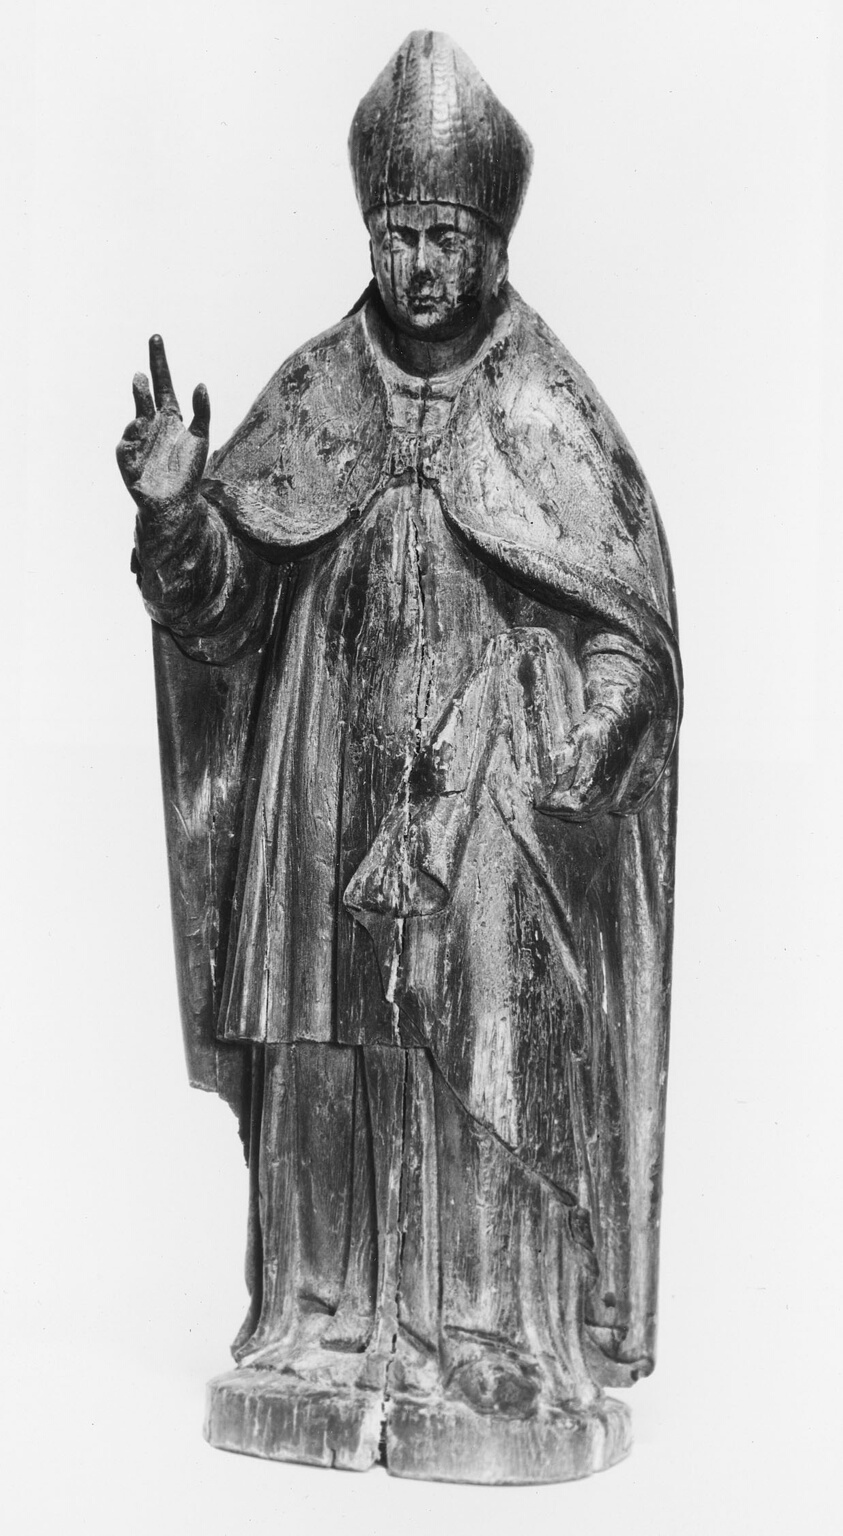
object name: Sculpture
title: Saint Martin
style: 15th century, 16th Century, sixteenth century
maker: French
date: 1475-1500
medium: Wood with traces of paint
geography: France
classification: statuette; sculpture; religious; sculpture/wood; wood; french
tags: saints, Christian subjects, Christianity, Devotion, man, religion, religious attire, religious figures